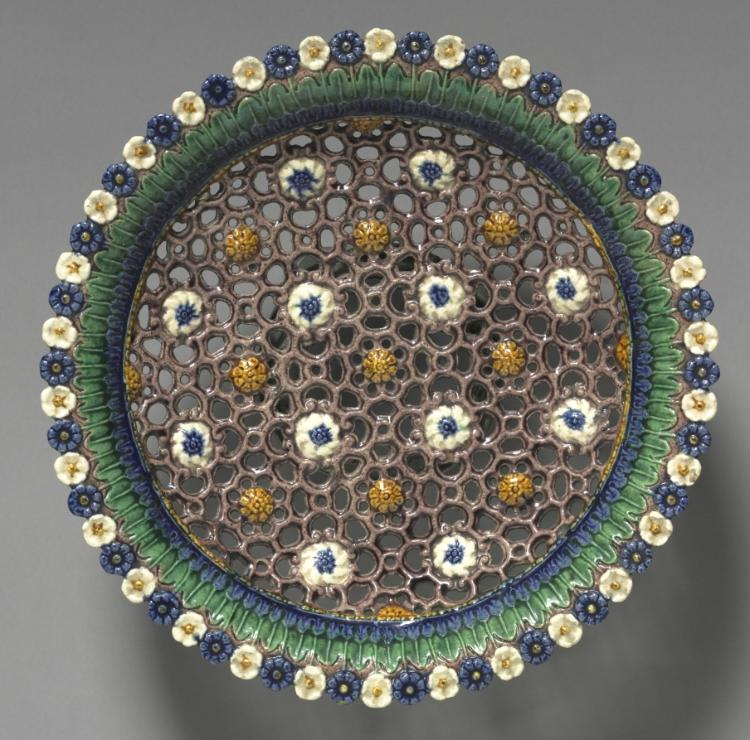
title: Dish with Open Work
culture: France, 16th century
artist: circle of Bernard Palissy (French, 1510–1589)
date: late 1500s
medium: lead-glazed earthenware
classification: Ceramic